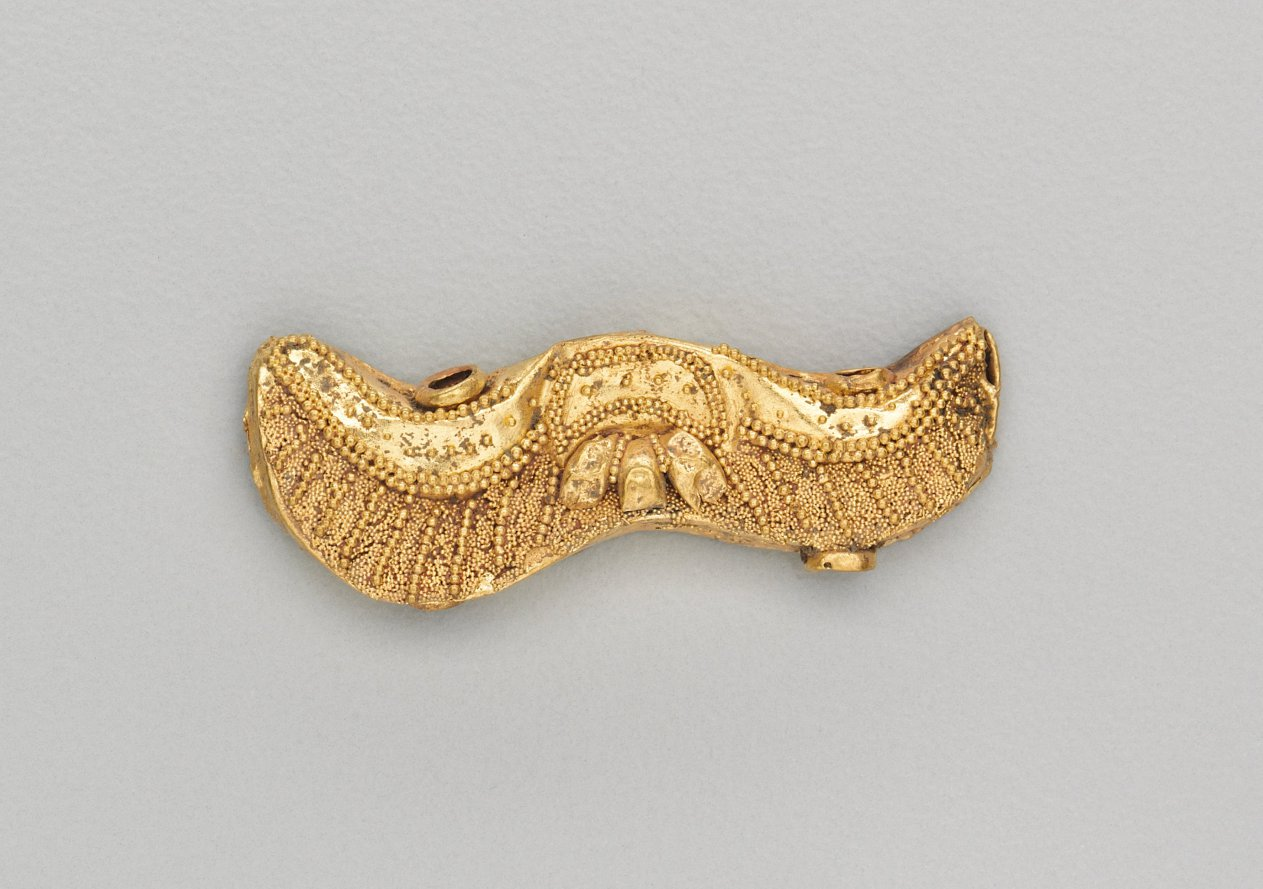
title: Set of Pendants Ending in a Bull's Head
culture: India, Shunga period (185–78 BCE)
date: 185–72 BCE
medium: gold repoussé with granulation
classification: Jewelry